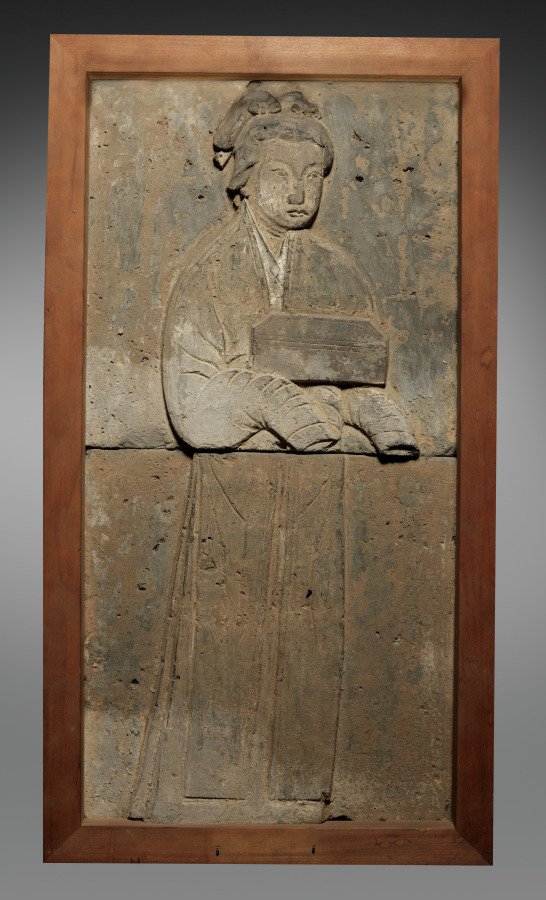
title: Relief of a Woman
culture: China, Jin dynasty (1115-1234)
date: 1115–1234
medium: Terracotta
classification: Sculpture